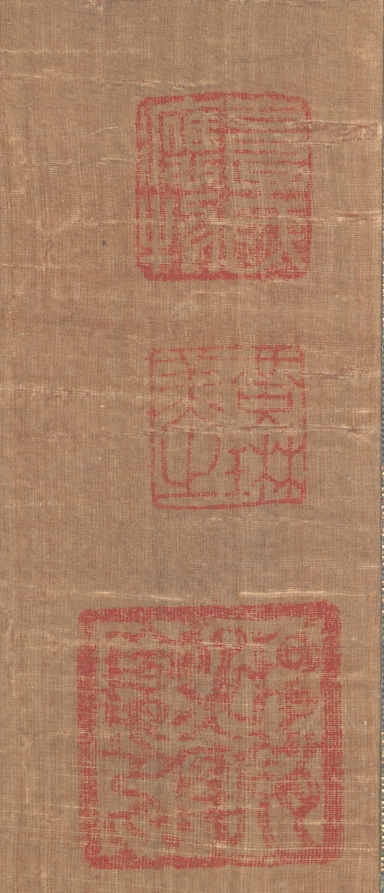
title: The Hermit Xu You Resting by a Stream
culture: China, Ming dynasty (1368–1644)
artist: Dai Jin (Chinese, 1388–1462)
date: 1400s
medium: Hanging scroll; ink and slight color on silk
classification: Painting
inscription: 5 seals: 1 of Huang Lin 黄琳 (active about 1496–1532); 4 unidentified.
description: Xu You, a recluse who refused the throne offered to him by legendary Emperor Yao, chose instead to farm on Mount Ji. Sitting under cliffs, his left arm resting on his risen leg and his loose robe revealing his belly, he displays a nonchalant attitude. Xu You is wearing a laborer’s outfit, a short robe and tight leggings, while his composed pose and gentle features reveal his lofty character. The composition shows rising mountains on the left juxtaposed by open space on the far right. Powerful brushstrokes and nuanced ink washes follow the style of the Southern Song (1127–1279) academy painters.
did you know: When the emperor offered him a post overseeing the Nine Territories (as China was known in ancient times), Xu You went to the River Ying to cleanse his ears from such an unwelcome proposition.